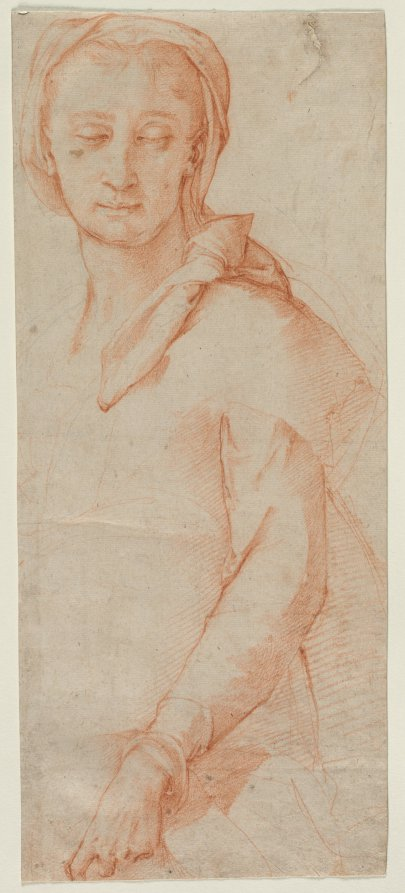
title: Half-Length Figure Study of a Woman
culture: Italy, Florentine, 16th century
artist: Ludovico Cardi Cigoli (Italian, 1559–1613)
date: 1500s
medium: red chalk over traces of black chalk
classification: Drawing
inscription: VERSO OF SECONDARY SUPPORT, lower center, in graphite: zar [illegible] / lower center, in graphite: Auction Klinkosch, Wien . / April 1889 / Kat. N° 825 . ; lower left, in graphite: 4 [underlined] ; lower right, in graphite: 319; lower left, in graphite: 319 . ; lower left, in graphite: A. del Sarto / [cf?] ; lower center, in graphite: L